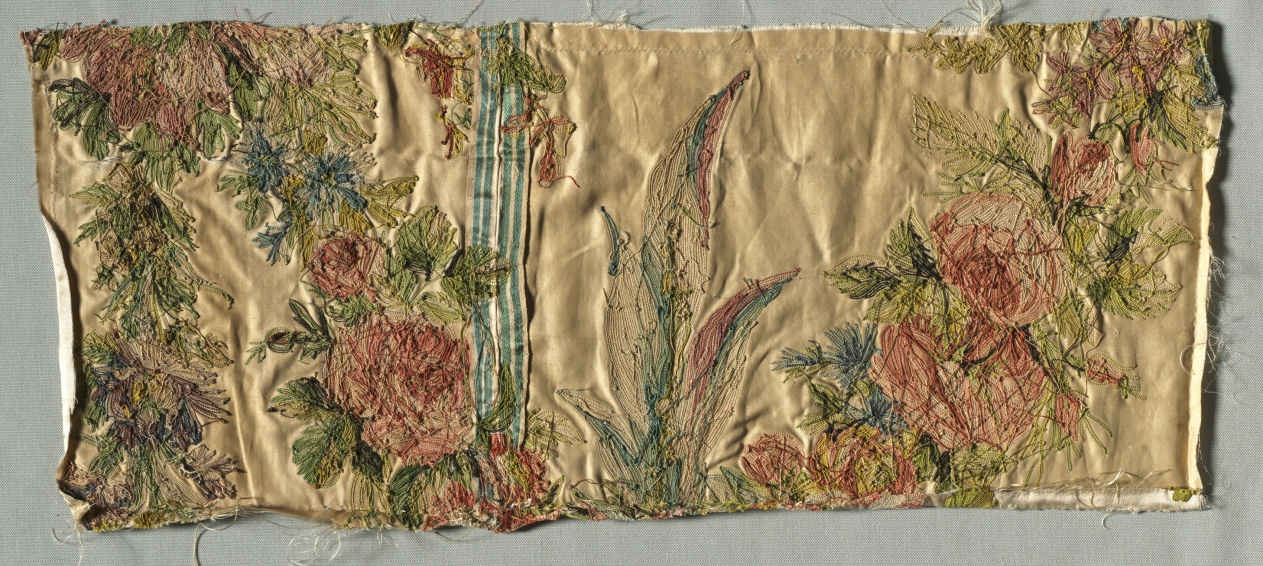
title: Coverlet Fragment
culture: France, 18th Century, period of Louis XVI (1774-1793)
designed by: Philippe de Lasalle (French, 1723–1805)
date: c. 1760–1770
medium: embroidered satin and silk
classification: Textile